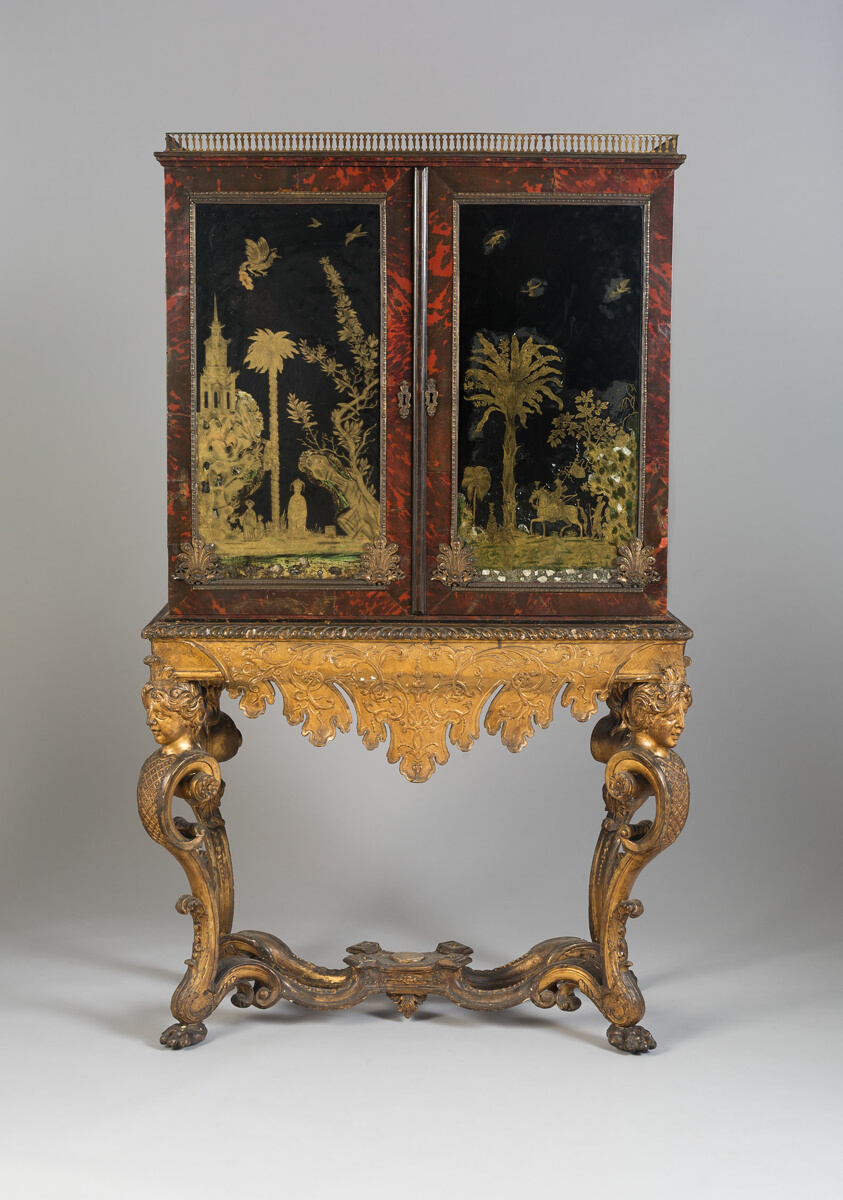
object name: Furniture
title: Cabinet on Stand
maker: Possibly Netherlands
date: Late 17th century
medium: Cabinet: wood, tortoiseshell, verre eglomise, and brass; Stand: gilded wood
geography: Netherlands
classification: case furniture; furniture; european decorative arts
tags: furniture